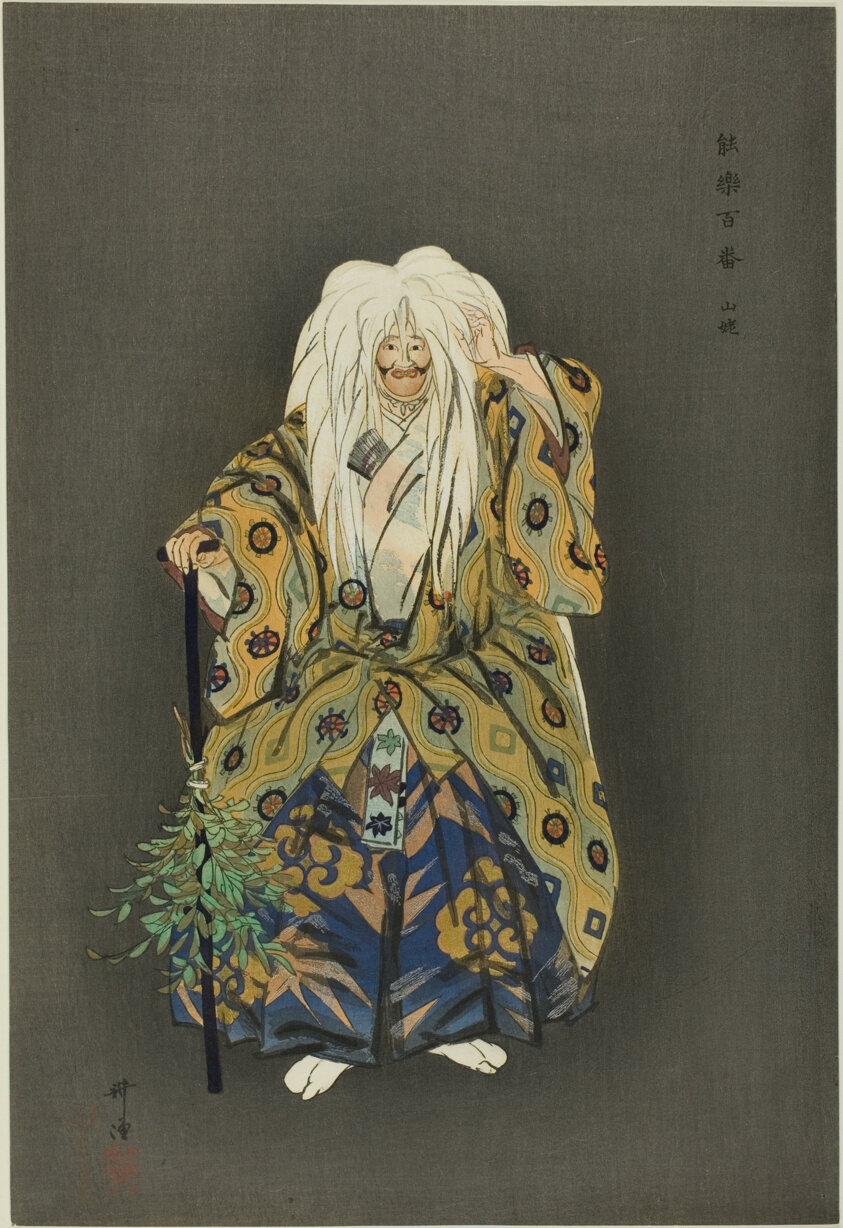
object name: Print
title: Yamamba, from the series "One Hundred No Dramas (Nogaku hyakuban)"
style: Japanese (culture or style)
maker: Tsukioka Kogyo; Japanese, 1869-1927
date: 1898/1903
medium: Color woodblock print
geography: Japan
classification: woodblock print; print; asian art